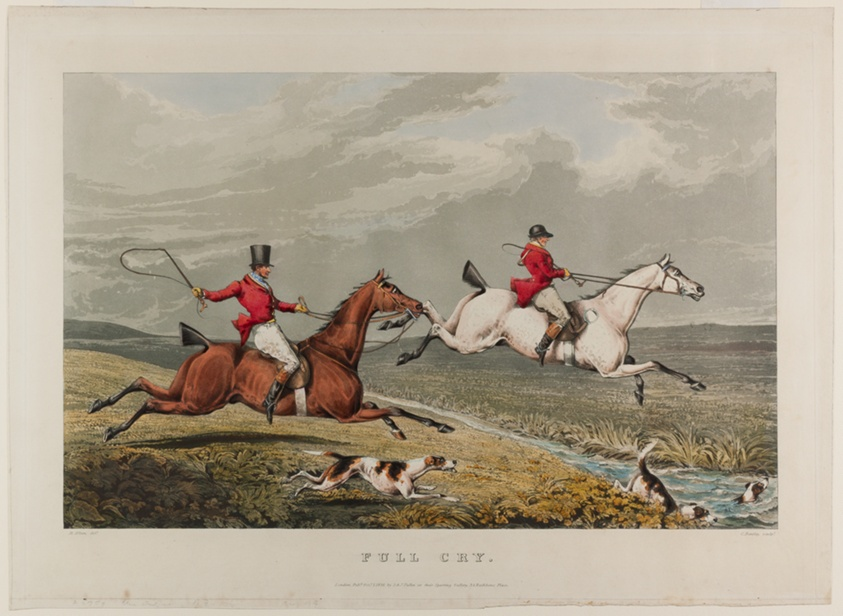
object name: Print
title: Full Cry, from the series Fox Hunting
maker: Charles Bentley (English, 1806-1854); after Henry Alken (English, 1785-1851); published by S. & J. Fuller (English, c.1809-1854)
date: 1828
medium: Hand-colored etching and aquatint on paper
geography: England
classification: aquatint; print; prints and drawing